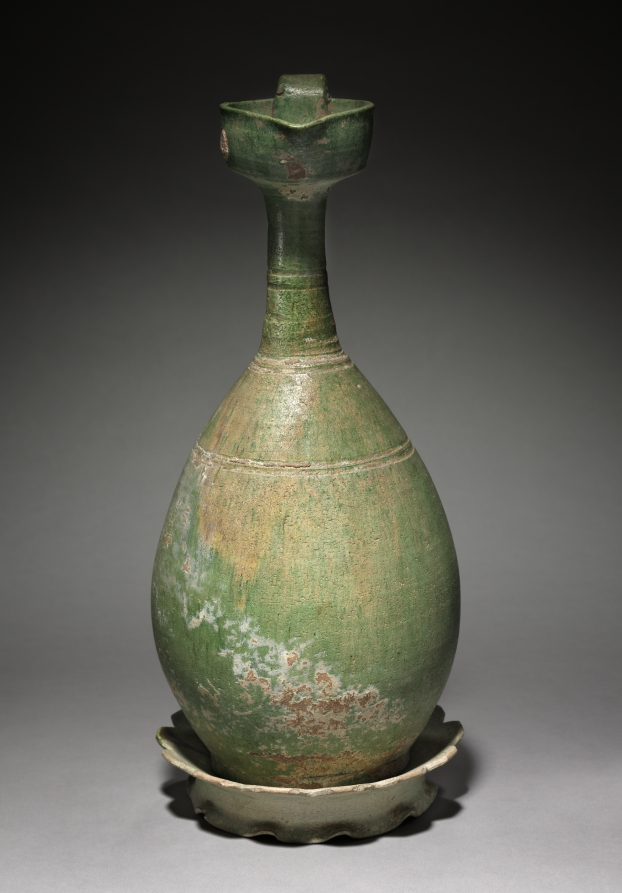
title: Ewer with Corolla Base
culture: China, Manchuria, Liao dynasty (916-1125)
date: 907–1125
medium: pottery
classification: Ceramic